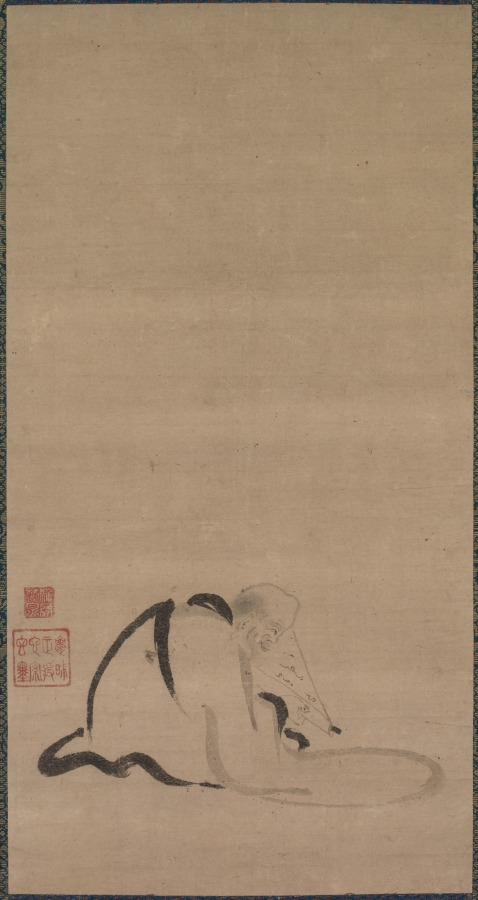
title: Seated Priest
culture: Japan, Momoyama period (1573-1615) to Edo period (1615-1858)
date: late 1500s-1650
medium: hanging scroll; ink on paper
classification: Painting